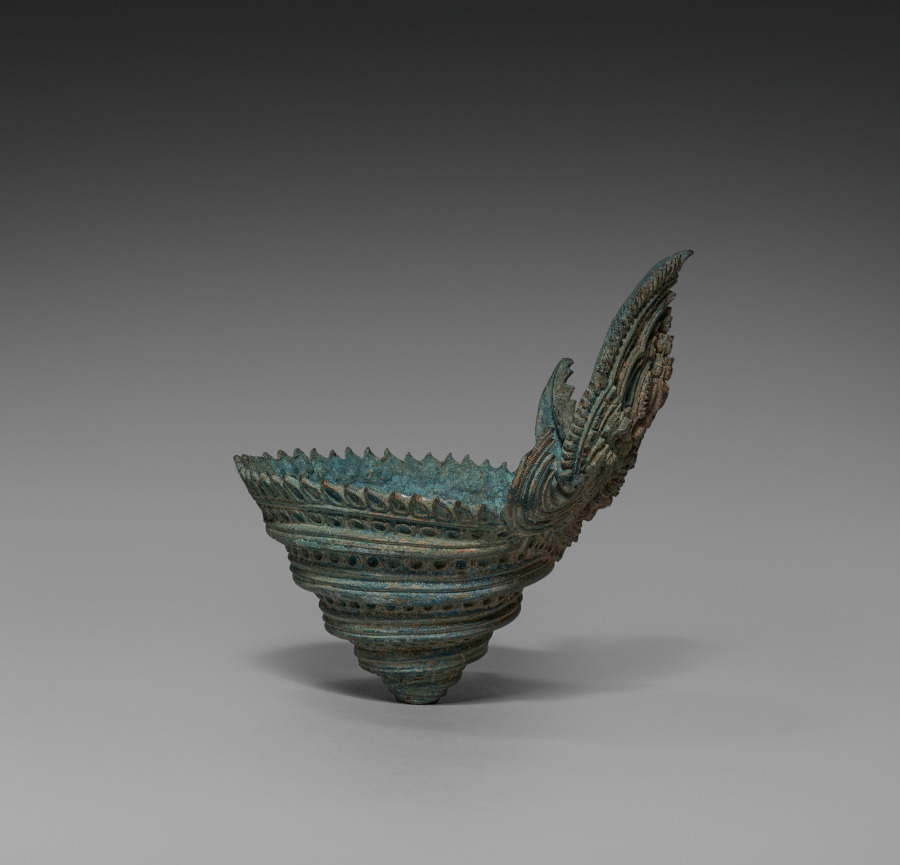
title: Ritual conch shell base with dancing Hevajra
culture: Cambodia, Khmer, Angkor Period, 12th-13th Century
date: 1100s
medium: shell and bronze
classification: Sculpture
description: A royal temple like Banteay Chhmar was built for performing rituals and to honor images of gods, Buddhas, and other sacred or enlightened beings for the sake of the kingdom’s protection and ongoing prosperity. Conch shells were blown at the start of rituals to make the sound corresponding to the syllable om. The dancing figure of Hevajra, a Buddhist being of enlightenment with eight heads, sixteen arms, and four legs, has been worked into the bronze embellishment of the shell. Hevajra was elevated to a prominent position in Khmer Buddhism of the Angkorian period as the standard figure denoting the practice of rituals prescribed in a text called the Hevajra-tantra. The tripod stand with three serpents is probably not original to the shell.